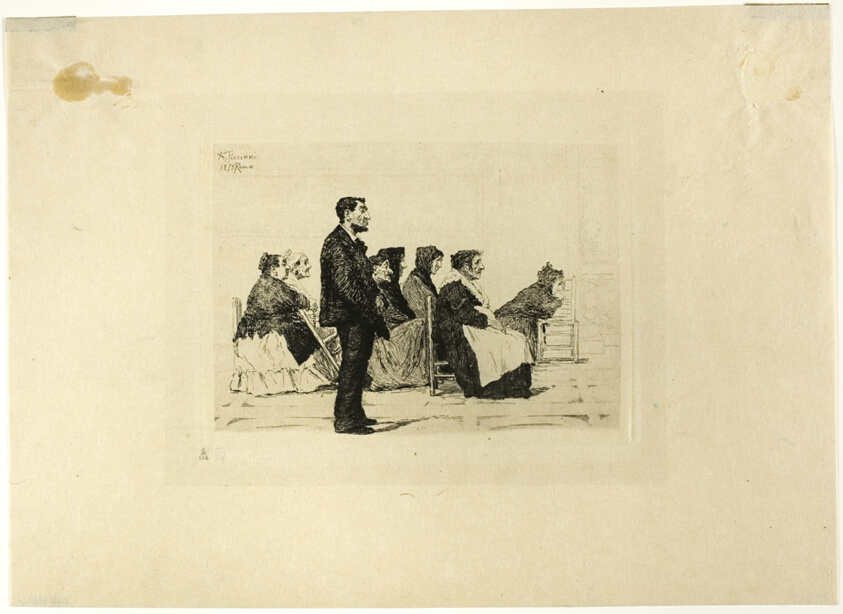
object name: Print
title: Group of People in Church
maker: Antonio Piccinni (Italian, 1846-1920)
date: 1875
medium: Etching in black, with gray plate tone, on paper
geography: Italy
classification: etching; print; prints and drawing